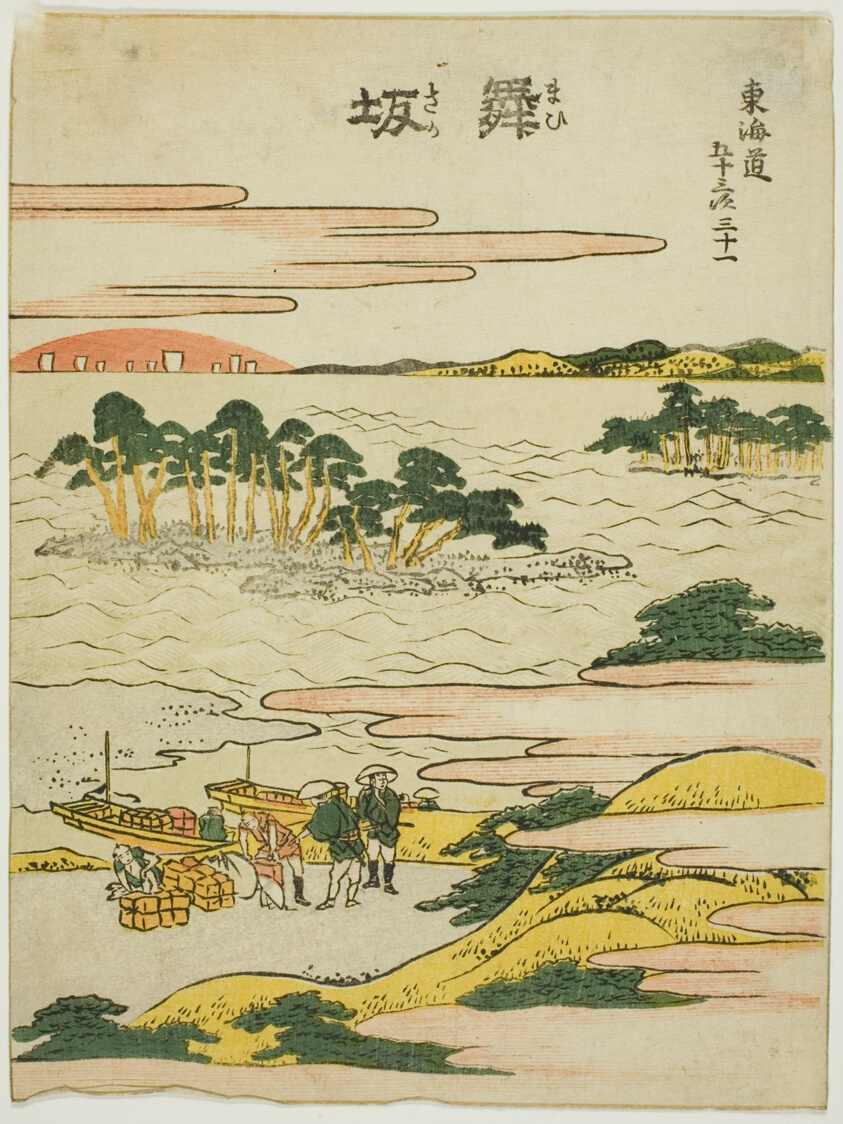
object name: Print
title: Maisaka, from the series "Fifty-three Stations of the Tokaido (Tokaido gojusan tsugi)"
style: Japanese (culture or style)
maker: Katsushika Hokusai 葛飾 北斎; Japanese, 1760-1849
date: c. 1806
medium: Color woodblock print; chuban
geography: Japan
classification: woodblock print; print